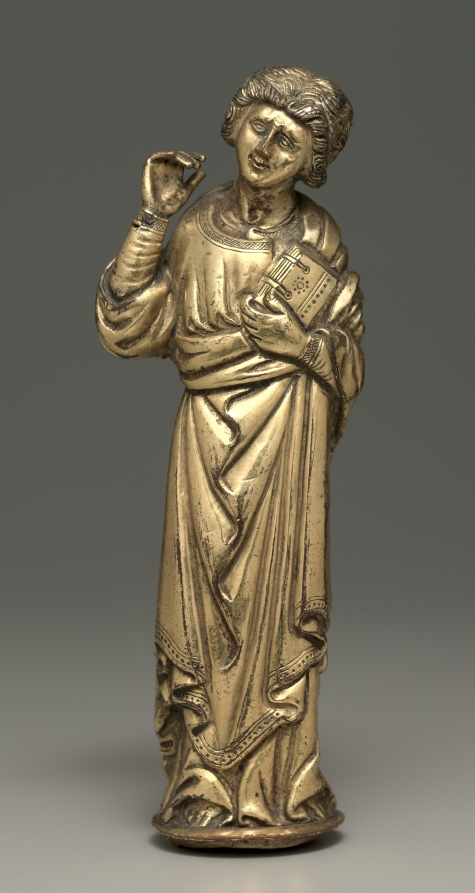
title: Mourning Saint John the Evangelist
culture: Austria, Upper Rhine, 15th century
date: early 1400s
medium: gilt copper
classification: Sculpture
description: These small statuettes would have originally flanked a crucifix as suggested by this arrangement. According to the Gospels, the Virgin and Saint John were present on Golgotha at Christ’s death. Medieval artists frequently depicted them standing next to the cross.